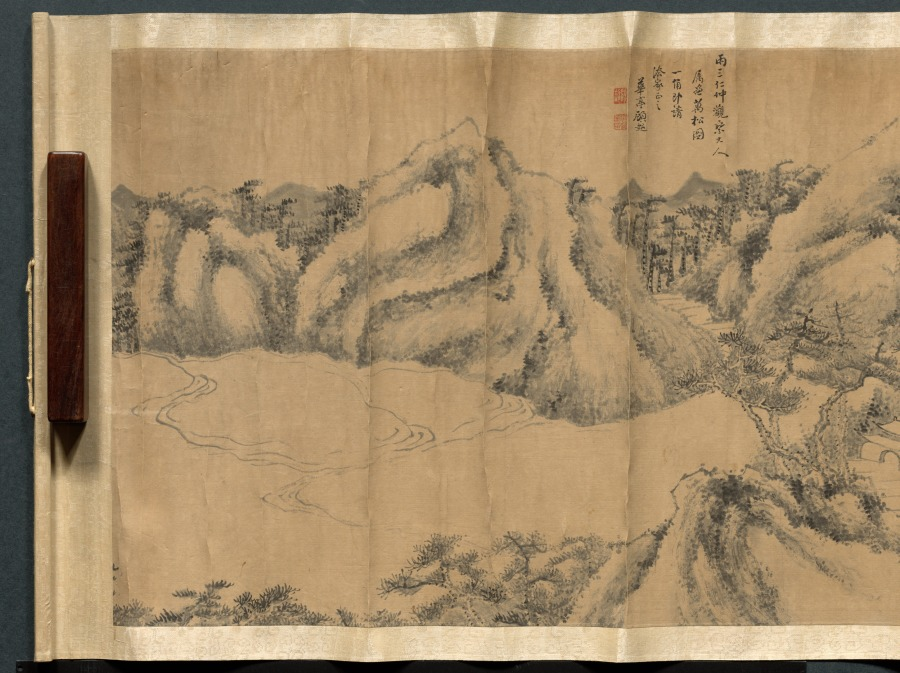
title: Pine-shaded Monastery on a Cloudy Mountain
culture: China, Qing dynasty (1644-1911)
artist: Gu Chao (Chinese, active late 1700s)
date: late 1700s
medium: handscroll, ink and slight color on paper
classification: Painting